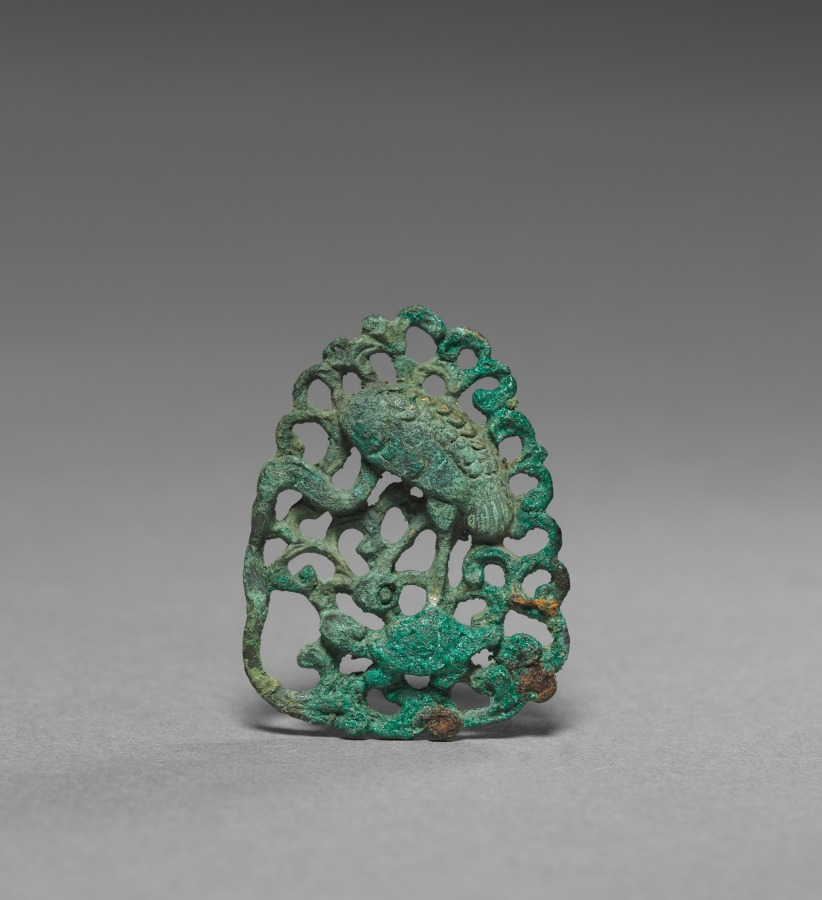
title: Ornaments with Heron and Turtle Design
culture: Korea, Goryeo dynasty (918–1392)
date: 1100s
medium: bronze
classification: Metalwork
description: Metalworking techniques advanced remarkably during the Goryeo period (918–1392). Sophisticated metal objects with intricate designs were used not only as daily accessories, but also as burial goods for commemorating the dead. Traces of fibers found on the backs of these metal ornaments suggest that they were once used as brooches to hold garments together.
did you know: This metal ornament is part of a decorative brooch once used to hold clothes together.